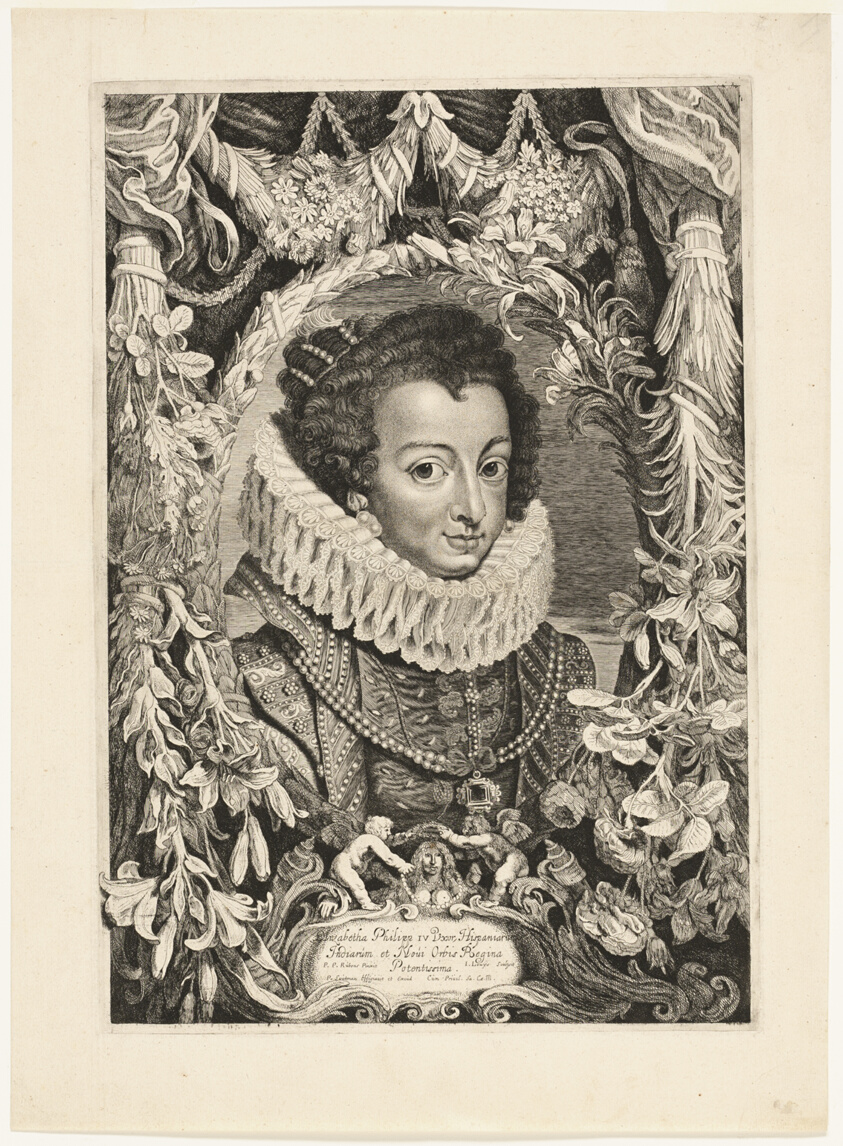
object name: Print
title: Elisabeth of Bourbon, Queen of Spain, plate 13 from Duces Burgundiae (Dukes of Burgundy)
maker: Jacob Louys (Flemish, 1595-after 1644); after Peter Paul Rubens (Flemish, 1577-1640); border engraved, and print published, by Pieter Claesz. Soutman (Dutch, c. 1580–1657)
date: 1644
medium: Engraving and etching in black on ivory laid paper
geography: Flanders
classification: etching; print; prints and drawing